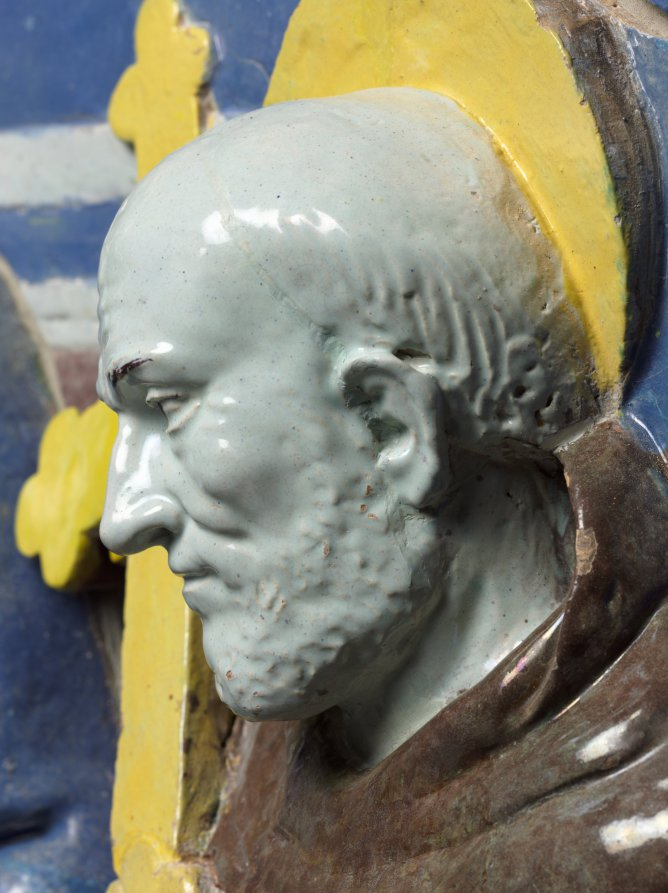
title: Virgin and Child Enthroned with Saints Francis and Giovanni Gualberto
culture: Italy, Florence, 16th century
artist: Benedetto Buglioni (Italian, 1461–1521)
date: c. 1510–20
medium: glazed terracotta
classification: Sculpture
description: The Madonna sits upon a throne with the Christ child standing on her knee. He is steadied by his mother, turning delicately to grasp her robe for support. On the left is Saint Francis, identified by his stigmata. On the right, Saint Giovanni Gualberto is identified by his monk's robe and distinctive processional cross. The brown robes of the saints, the purple of the Virgin's tunic, and the flesh tones of the figures contrast strongly against the bright blue background. In the semicircular sky behind the figures, three winged cherub heads emerge, representing a host of angels. Glazed terracotta is both durable and decorative and the gleaming white of this piece would have stood out in the darkness of a church. The medium was made popular by Renaissance artist Luca della Robbia and came into fashion as a substitute for expensive carved marble. A rounded arch frame embellished with fruit and flower garlands as well as egg-and-dart and cord moldings accompanied the work when it was acquired, but was later determined not to be original and removed. Buglioni's work bears the influence of the della Robbias, particularly in the simple color scheme. Buglioni likely worked in the studio of Luca's nephew, Andrea, where he would have learned the technique of glazing terracotta.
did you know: The unusual purple hue is particular to the artist.